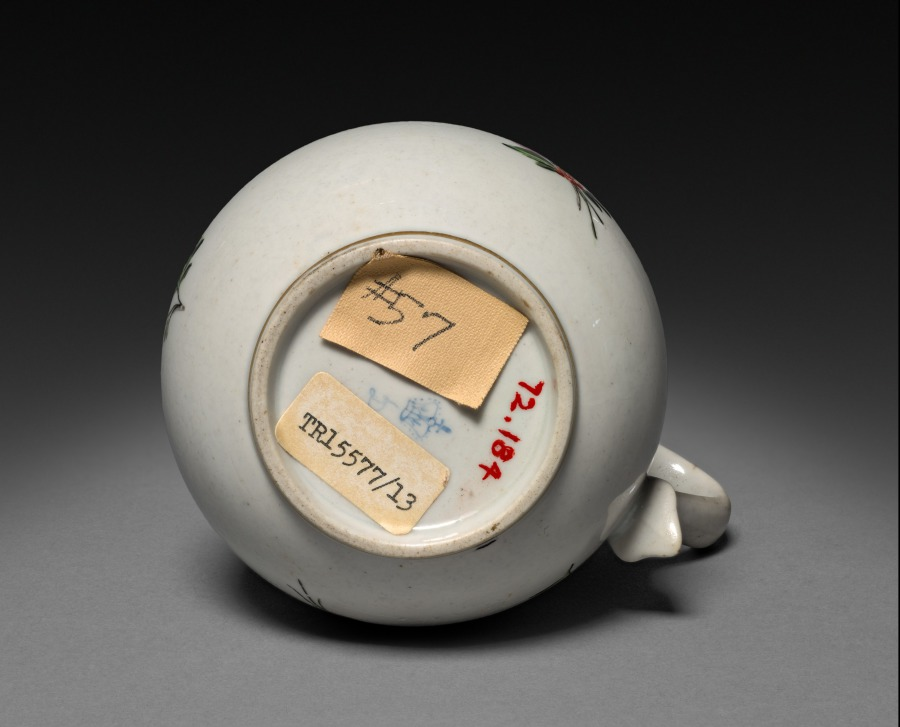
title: Duseberry Cream Pot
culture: England, Derby, 18th century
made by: Derby Porcelain Factory (Chelsea-Derby Period, 1770–84)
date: c. 1770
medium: soft-paste porcelain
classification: Ceramic